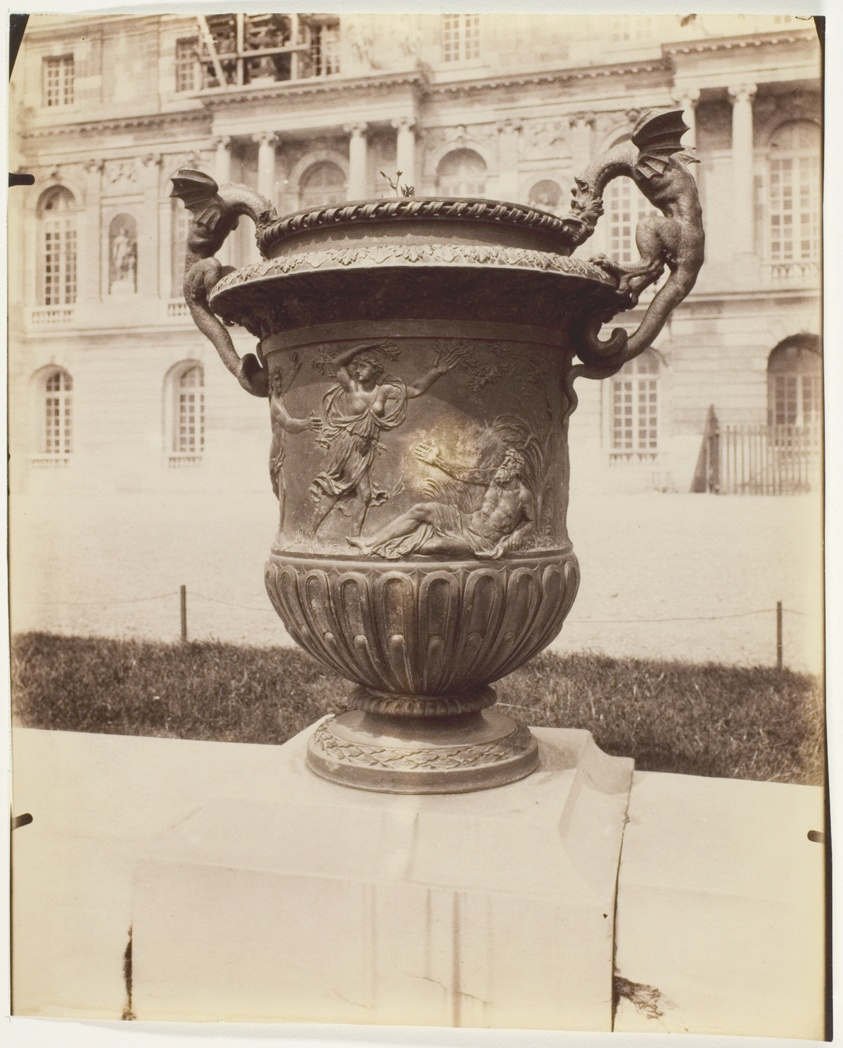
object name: Photograph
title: Versailles, Vase par Ballin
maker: Jean-Eugène-Auguste Atget (French, 1857–1927)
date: 1903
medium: Albumen print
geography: France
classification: albumen silver print; photographic process; photography; photograph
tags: Collected by Hugh Edwards